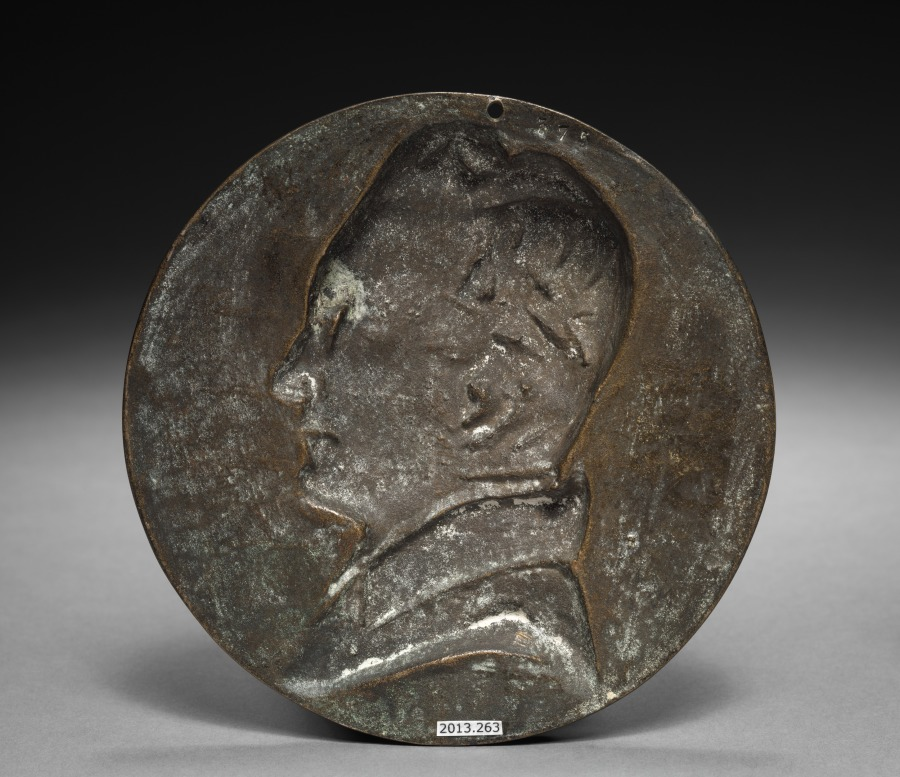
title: Gustave Planche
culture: France, 19th century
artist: Pierre-Jean David d'Angers (French, 1788–1856)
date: 1832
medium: bronze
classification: Sculpture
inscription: inscribed on the left with marks made in the mold: "GUSTAVE PLANCHE." Also inscribed in the mold in the lower center: "P.J. DAVID / 1832." The medallion is stamped on the back: "375."